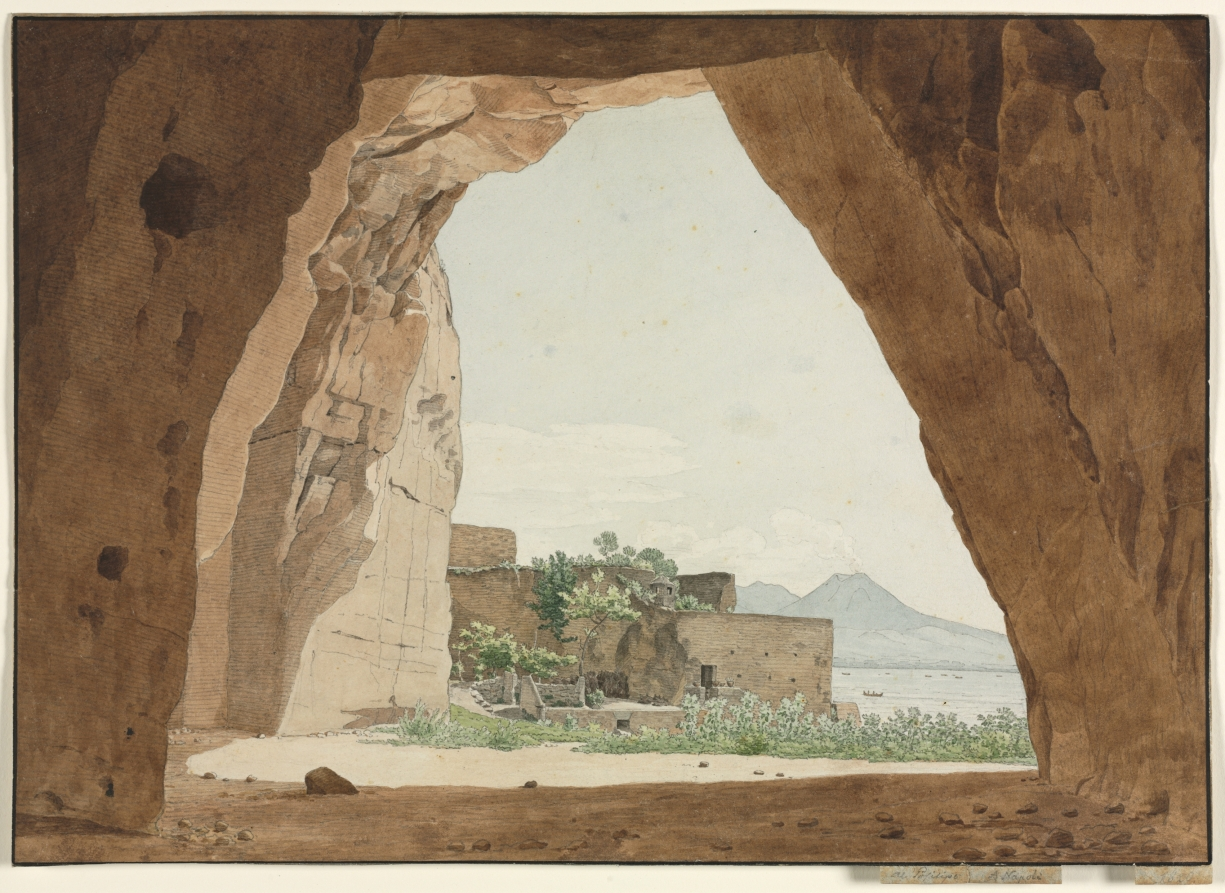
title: Vesuvius and the Bay of Naples from a Cave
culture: Germany, 19th century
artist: Adolf von Heydeck (German, 1787–1856)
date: 1820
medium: watercolor with graphite; framing lines in pen and black ink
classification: Drawing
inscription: inscribed on secondary support [by artist?], lower right, in graphite: al Posilipo A Napoli 1820; on verso of secondary support, upper left, in graphite: 44/ ; upper left, in graphite: Al Posilipo a Napoli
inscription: unidentified collector's mark, verso of secondary support, upper right, stamped in blue ink: H [illegible] [surrounded by an oval double border]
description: Adolf von Heydeck worked in Rome and later traveled south to Naples. This drawing presents that city’s most distinctive attraction: Mount Vesuvius, an active volcano that appears against an otherwise calm sky. Von Heydeck portrayed the scene from within a cave interior, contrasting the potentially overwhelming force of nature with the illusion of protection offered by distance and enclosed space.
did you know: Mount Vesuvius was almost continuously active at the time that Adolf von Heydeck visited Naples, and erupted just two years after this drawing was completed.